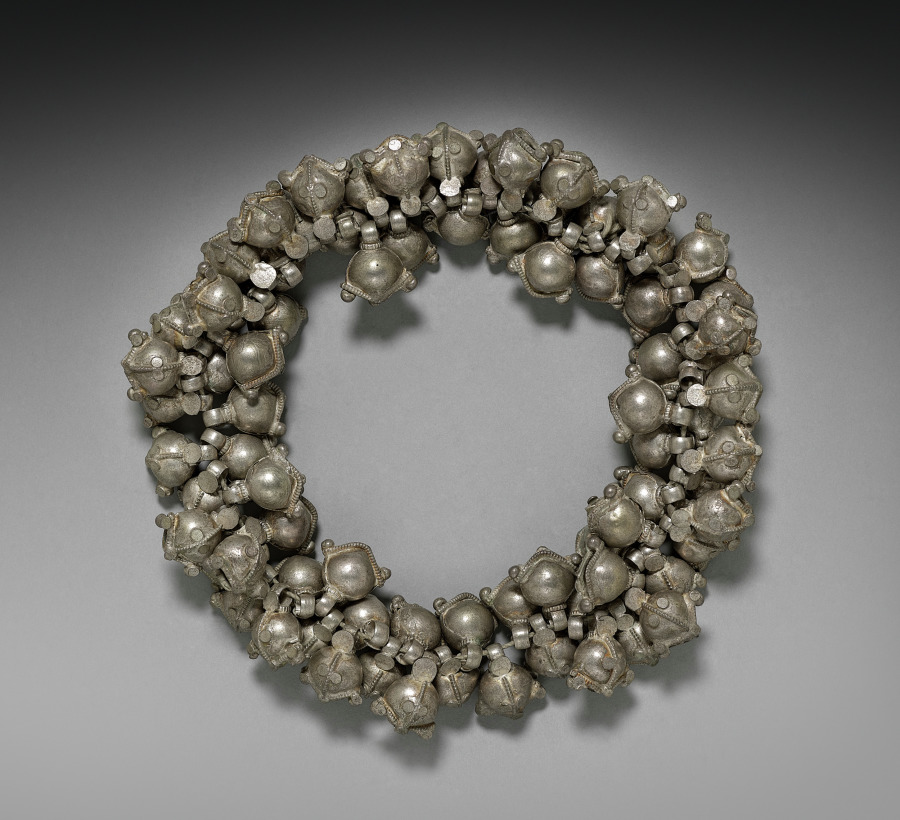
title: Necklace in the Form of Bells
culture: India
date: early 1900s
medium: silver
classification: Jewelry